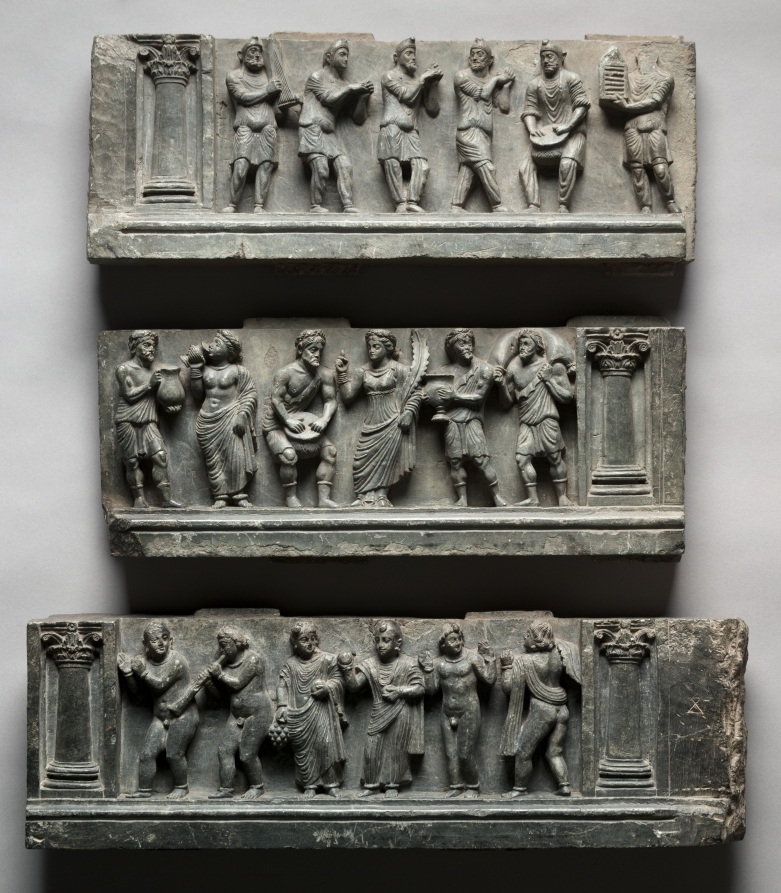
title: Foreigners and Non-Buddhists Drink, Dance, and Play Music, from a Buddhist Stupa Site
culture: Pakistan, Gandhara, Buner area, early Kushan period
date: c. 100 CE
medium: schist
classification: Sculpture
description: These three relief panels are from a group thought to have been used as ornamental stair risers at a Buddhist monument. They may have led up to a platform on which was established a stupa for veneration by followers of Buddhism. Phrygians with their trousers, tunics, and conical caps play music, dance, and clap, while Greek figures drink and carry wine. Naked figures and those wearing flowing robes and unusual hairstyles may be representatives of non-Buddhist sects, such as Jainism or the now defunct Ajivika religion. Bacchanalian scenes involving the ethnic and religious "other" were carved on the lower portions of public monuments in this multicultural region through which many international travelers passed during this time of heightened trade with the Mediterranean world.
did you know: Wine cups made of silver were also used as Buddhist reliquaries in this region.